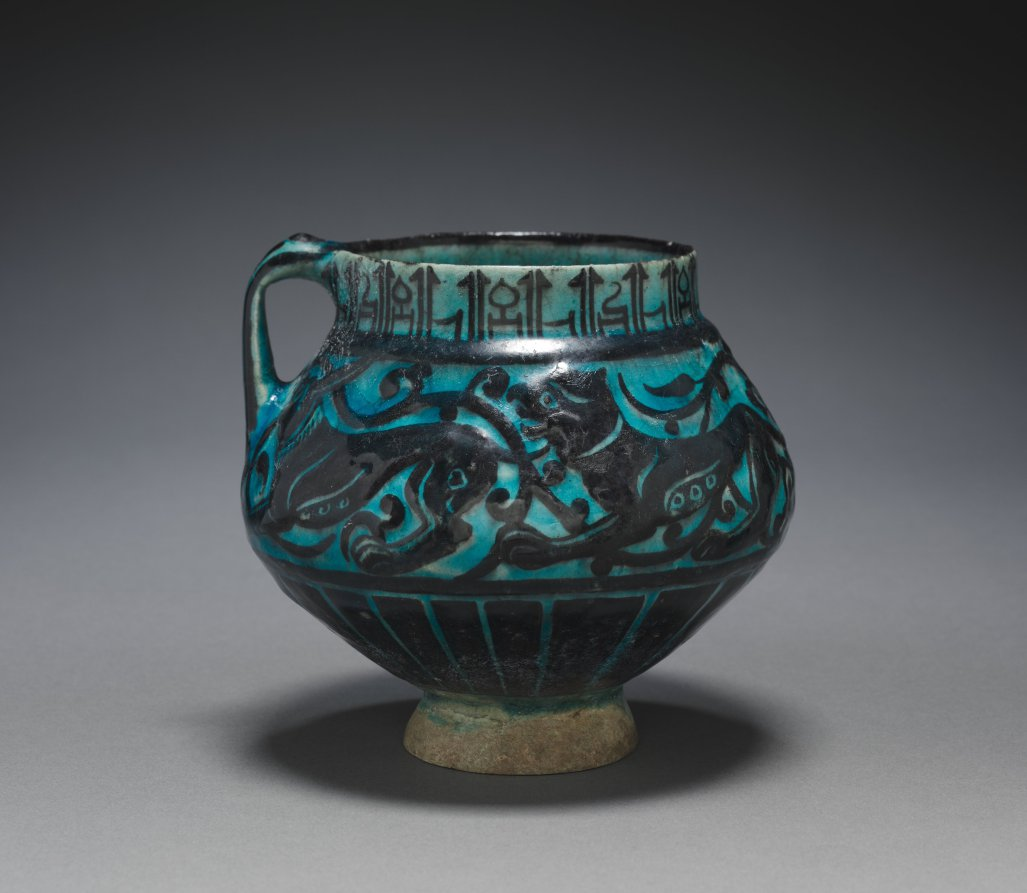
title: Jug with Running Animals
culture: Iran, probably Kashan, Seljuq period of Iran (1037–1194)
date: 1150–1220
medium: fritware with design in carved and underglaze-painted slip ("silhouette" ware)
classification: Ceramic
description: "Silhouette" ware continues the tradition of painting with slip (liquefied clay) directly on the white body beneath the glaze. On this jug, thick black slip was applied and then carved with a knife to create the design of running animals and pseudo-script.